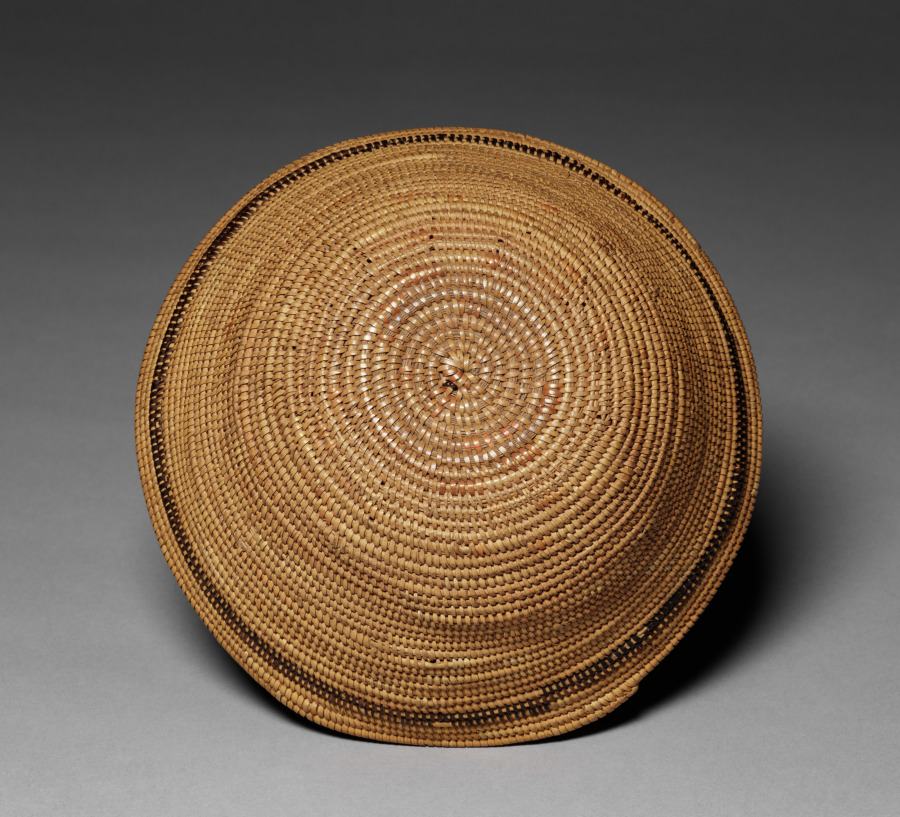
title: Hat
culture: California, Southern, Late 19th- Early 20th century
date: c 1875– 1925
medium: Juncus, Sumac; Coiled; Deergrass foundation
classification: Basketry